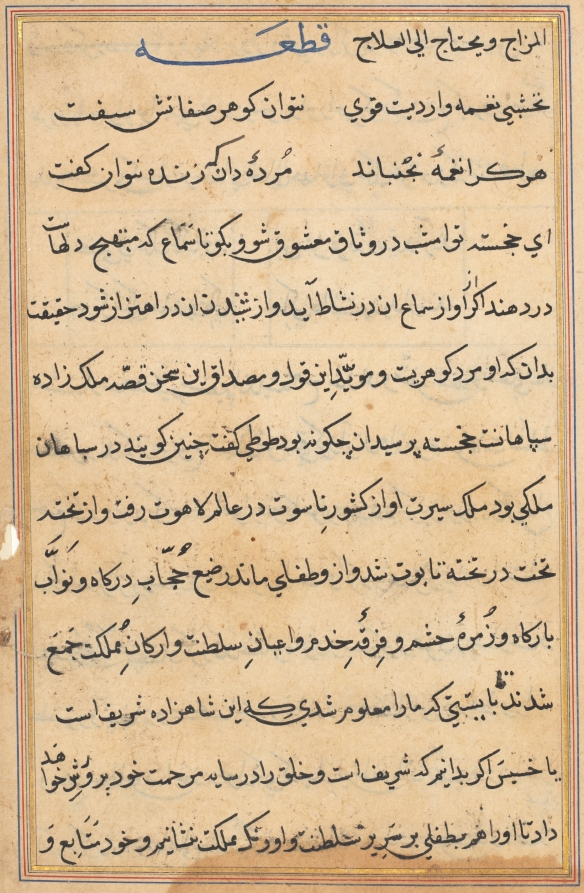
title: Page from Tales of a Parrot (Tuti-nama): text page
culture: Mughal India, court of Akbar (reigned 1556–1605)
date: c. 1560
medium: gum tempera, ink, and gold on paper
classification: Painting